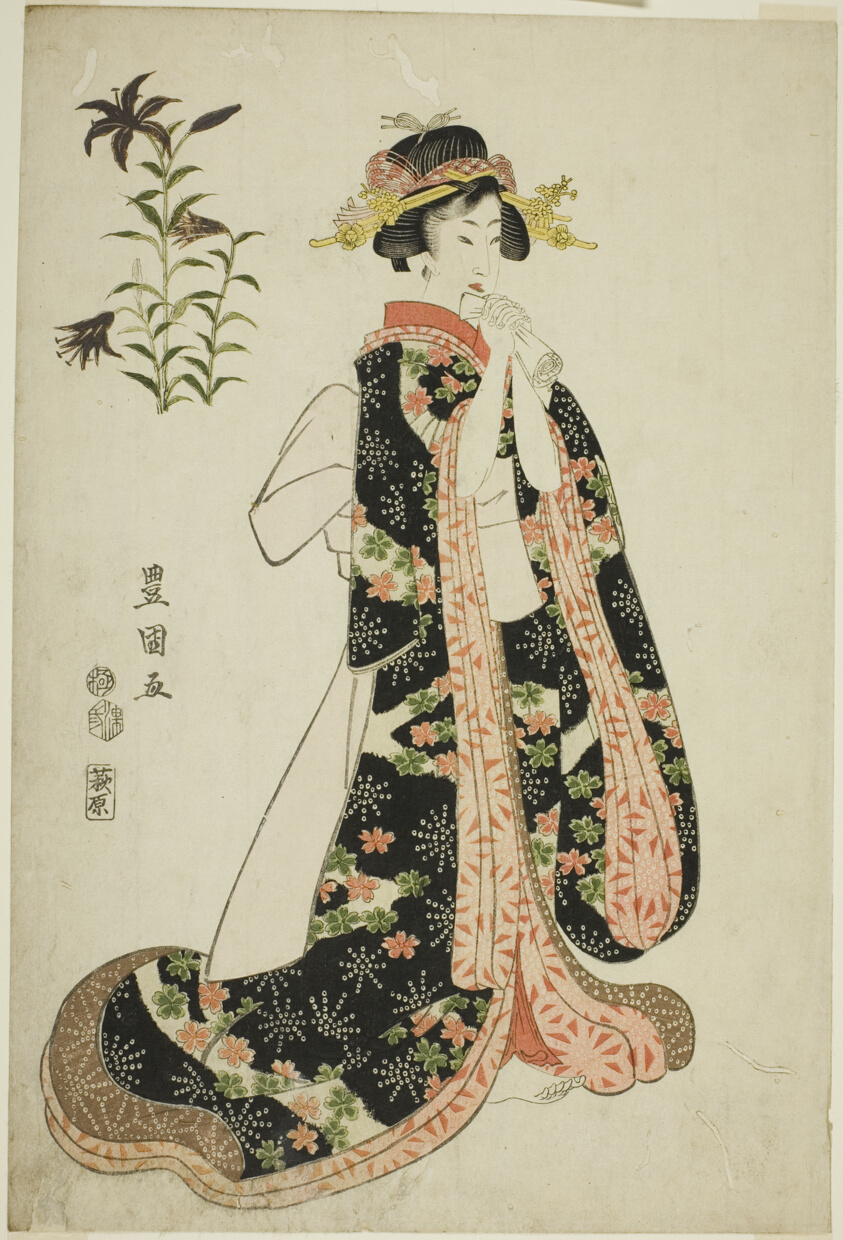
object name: Print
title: Lilies: young woman holding a letter, from an untitled series of beauties and flowers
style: Japanese (culture or style)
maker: Utagawa Toyokuni I 初代 歌川 豊国; Japanese, 1769–1825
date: 1812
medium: Color woodblock print; oban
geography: Japan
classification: woodblock print; print; asian art